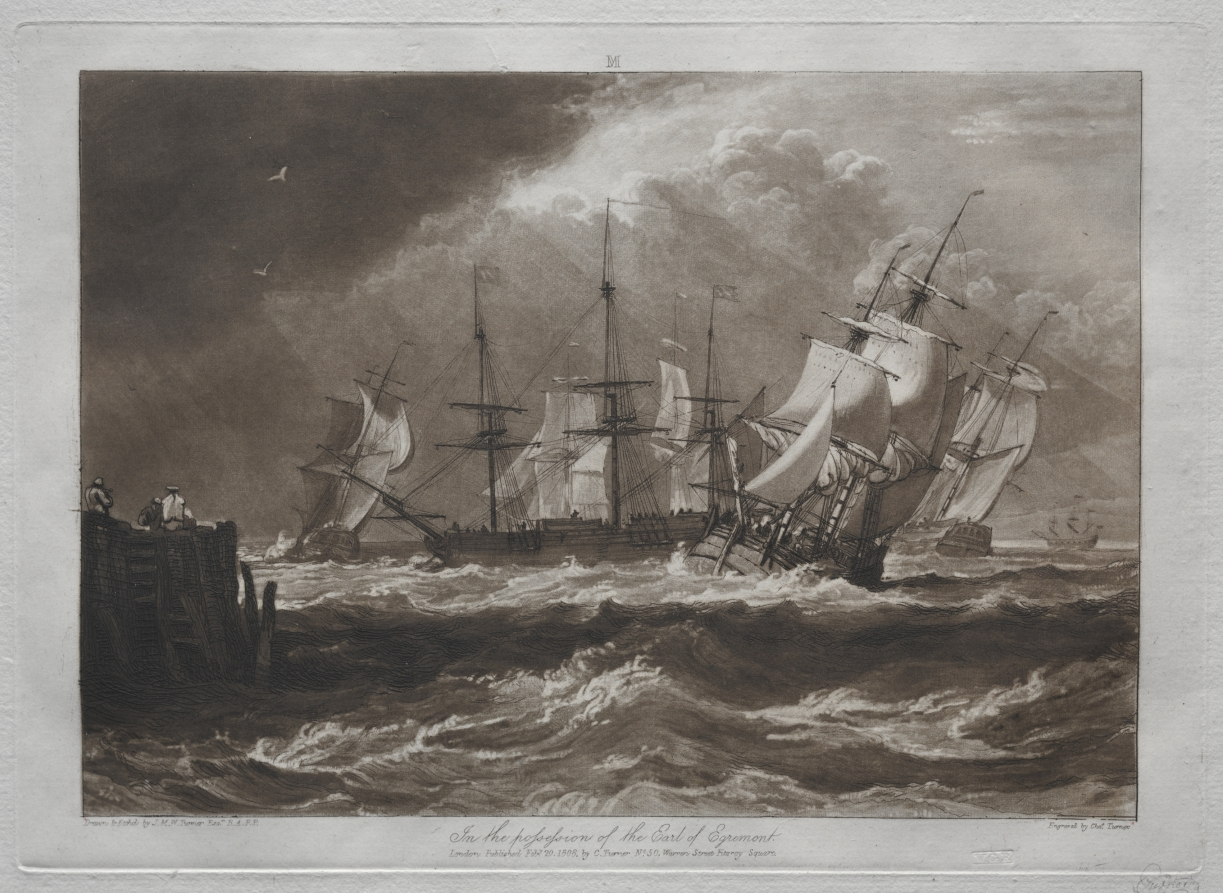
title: Liber Studiorum: Ships in a Breeze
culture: England, 19th century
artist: Joseph Mallord William Turner (British, 1775–1851)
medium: etching and mezzotint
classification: Print